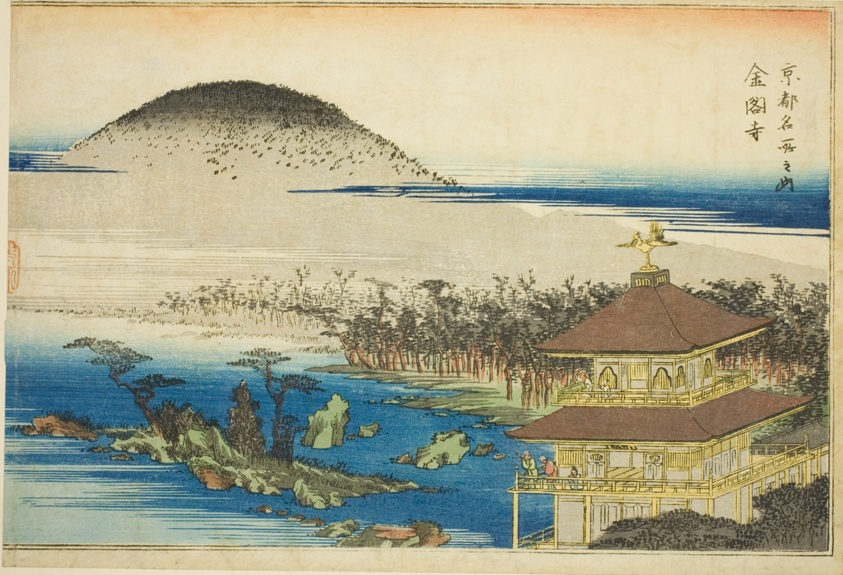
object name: Print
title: The Temple of the Golden Pavilion (Kinkakuji), from the series "Famous Places in Kyoto (Kyoto meisho no uchi)"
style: Japanese (culture or style)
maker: Utagawa Hiroshige 歌川 広重; Japanese, 1797-1858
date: c. 1834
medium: Color woodblock print; oban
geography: Japan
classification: woodblock print; print; asian art